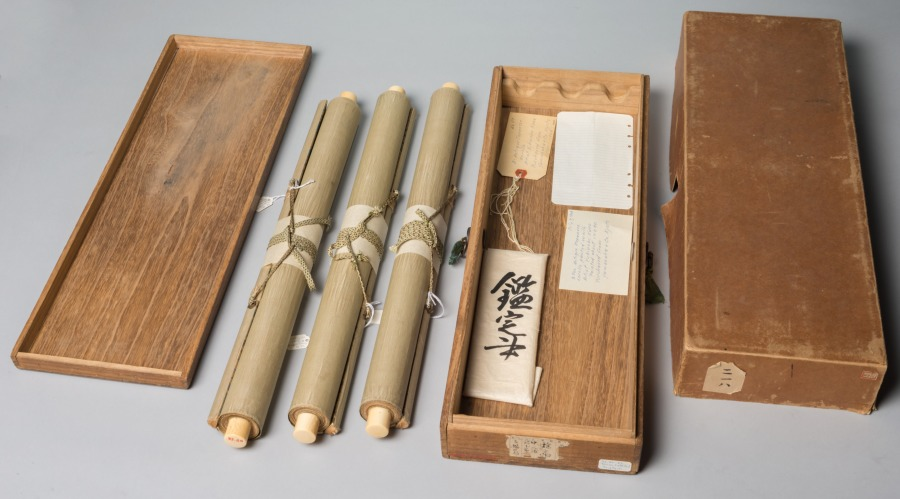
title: Sparrows on Blossoming Plum; A Sage with Tiger; Chinese Bird on Snow-Laden Branch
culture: Japan, Edo period (1615–1868)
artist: Kano Tan’yū (Japanese, 1602–1674)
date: 1661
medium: Triptych of hanging scrolls; ink and slight color on silk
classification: Painting